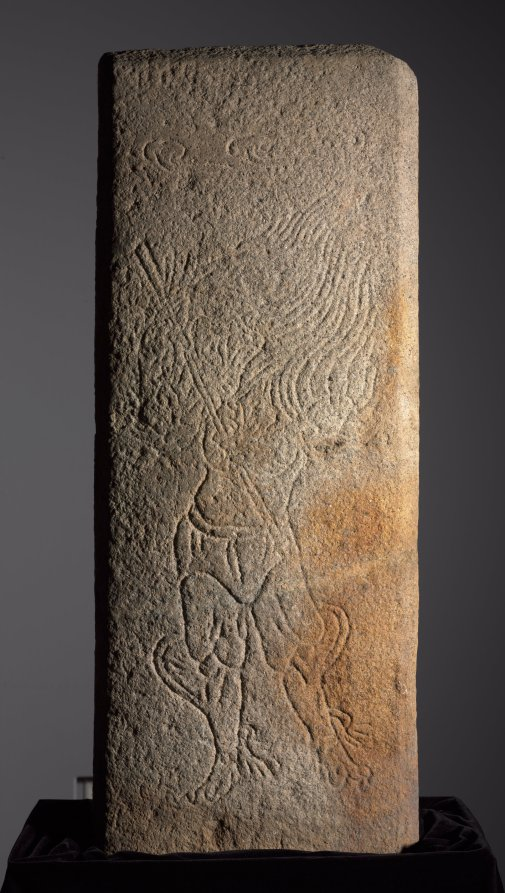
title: Stone Panel for Royal Tomb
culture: Korea, Unified Silla period (676-935)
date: late 700s-early 800s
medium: granite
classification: Sculpture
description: This panel shows a figure with a human body and the features of a rat, which is one of the signs of the Asian zodiac, and is likely one of 12 granite panels from a royal tomb. It is probably from Gyeongju—the capital of the kingdoms of the Silla (57 BCE–668) and Unified Silla (688–935) periods—where large royal tomb mounds can still be found. This panel resembles those showing the animal signs of the Korean zodiac from the tomb of General Kim Yusin (595–673) in Gyeongju, the most famous tomb of the period.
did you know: A rat, one of the signs of the East Asian zodiac, carved in this stone panel symbolizes wealth.